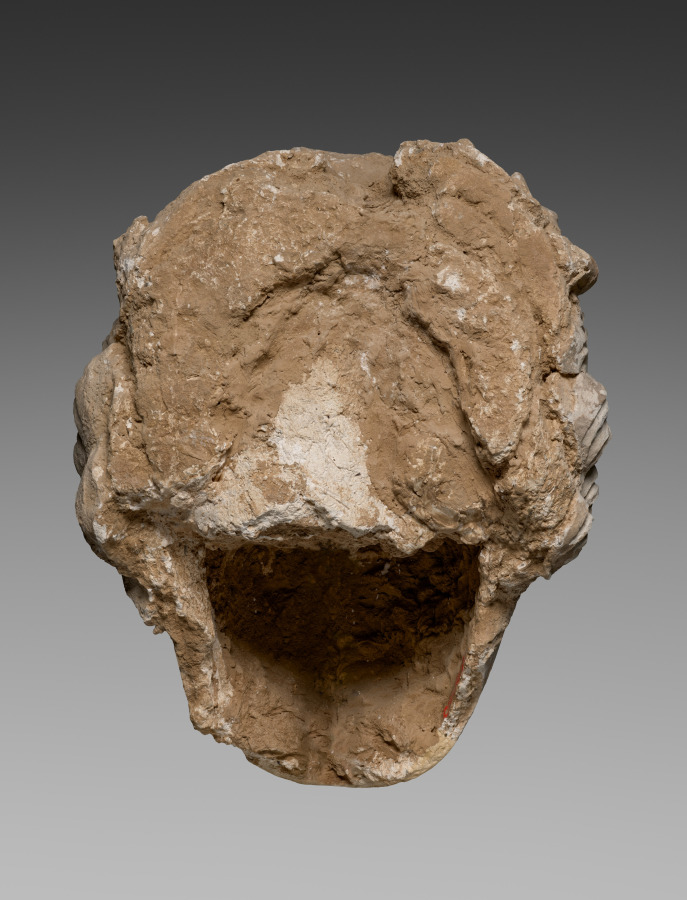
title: Head of Bodhisattva Avalokiteshvara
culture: Afghanistan or Pakistan, Gandhara, Kushan period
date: 300s–400s CE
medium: stucco with traces of paint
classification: Sculpture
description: By this period, individual bodhisattvas were beginning to be revered as ideal figures who would deliberately postpone their own enlightenment and entrance into final nirvana, which is a state from which no one returns to be reborn into this world. Bodhisattvas accomplish all but the final meditation leading to full enlightenment, but they are considered to be so advanced in their practice and realization that they have the ability to control their rebirth and act in righteous and compassionate ways to help others achieve enlightenment. Because the remains of a lotus pedestal on which a Buddha sat is at the center of the diadem, this head can be identified as that of the Bodhisattva of Compassion. The idealized linearity of the brows and eyes along with the formalized waves of hair give an ethereal quality to the otherwise naturalistic face.